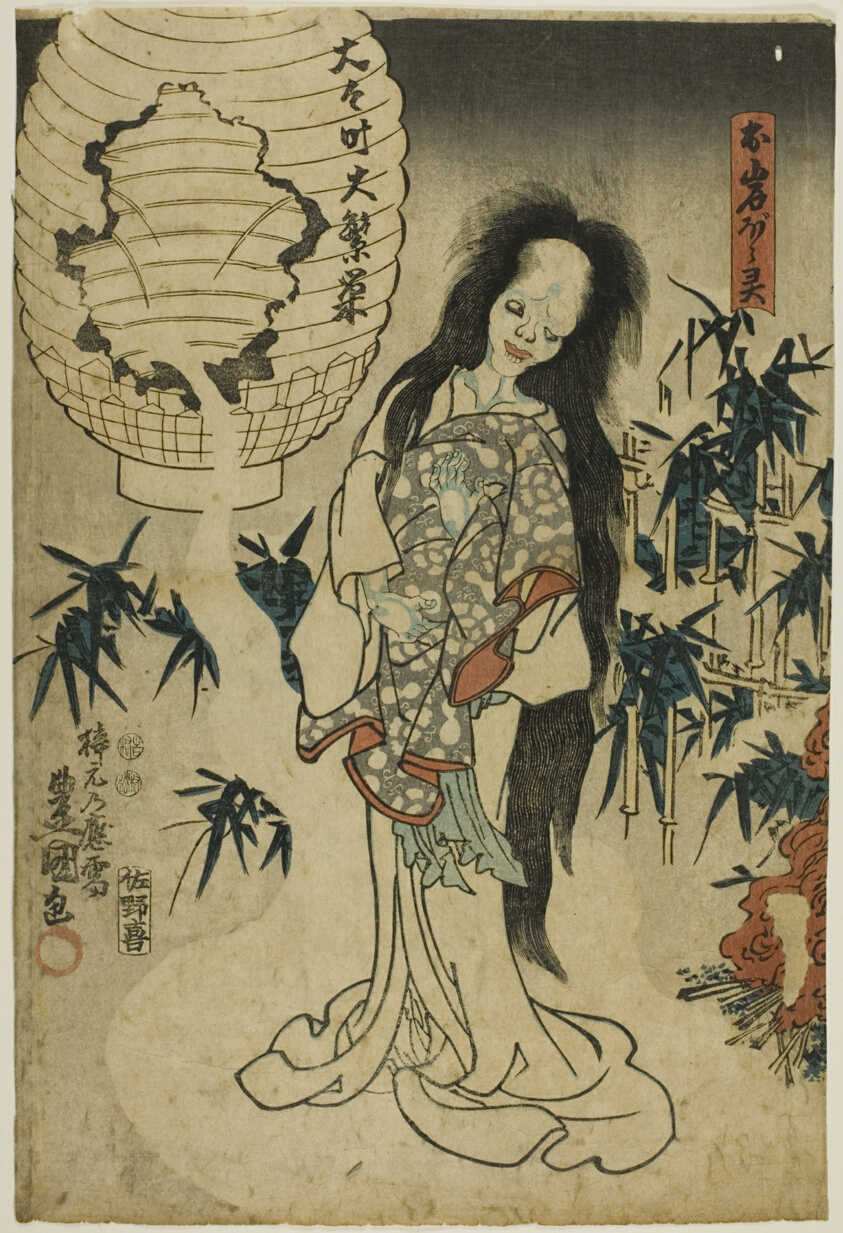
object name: Print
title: Oiwa's Ghost (Oiwa no borei)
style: Japanese (culture or style)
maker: Utagawa Kunisada I (Toyokuni III) (Japanese, 1786-1864)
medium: Color woodblock print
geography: Japan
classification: woodblock print; print